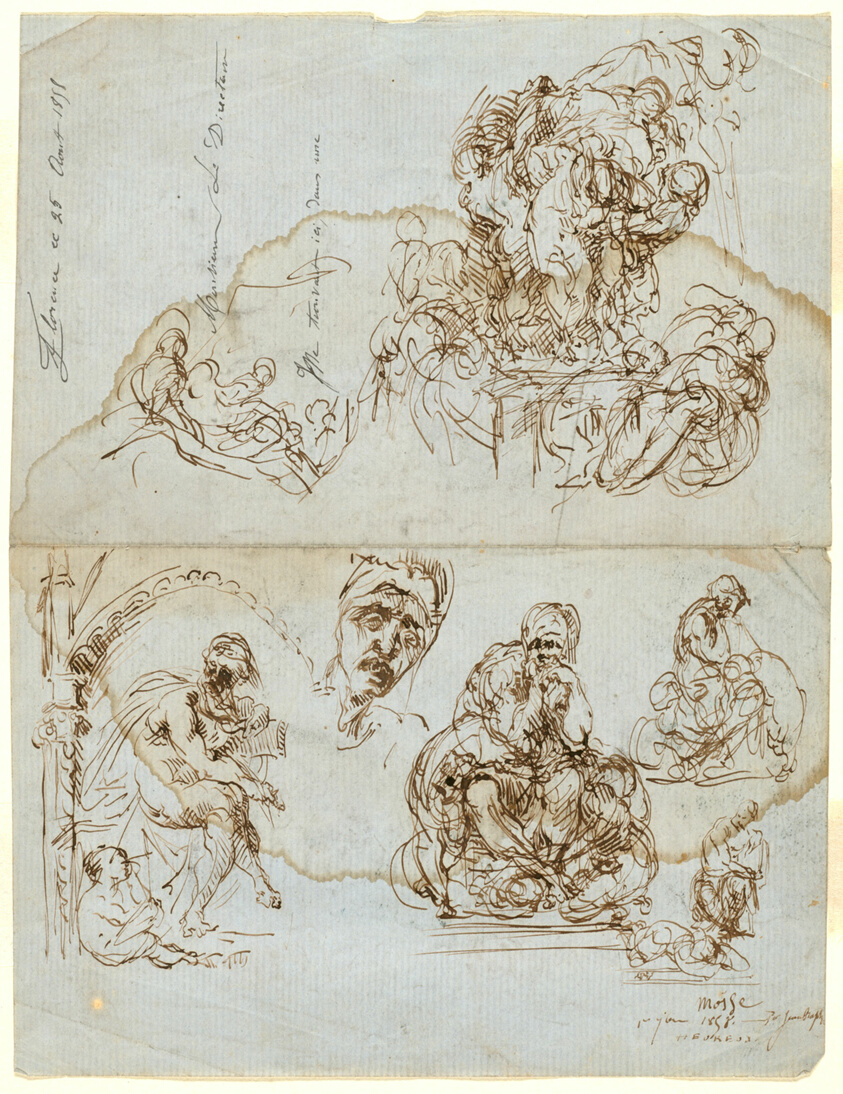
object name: Drawing and Watercolor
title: Unfinished Letter with Studies for the Ugolino Group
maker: Jean Baptiste Carpeaux (French, 1827-1875)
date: 1858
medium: Pen and brown ink on blue laid paper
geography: France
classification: pen and ink drawings; drawings (visual works); prints and drawing